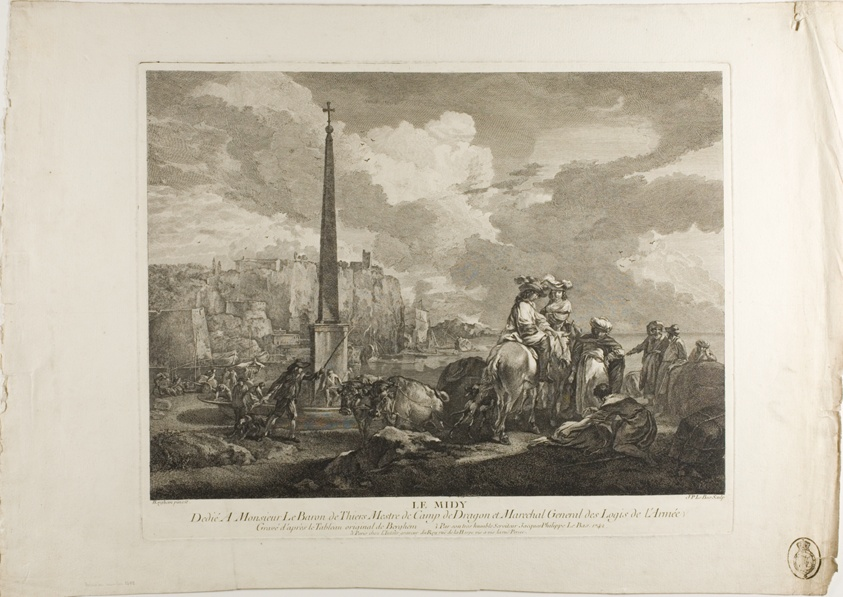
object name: Print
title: Le Midy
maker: Jacques Philippe Le Bas (French, 1707-1783); after Nicolaes Berchem, the elder (Dutch, 1620-1683)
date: 1742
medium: Engraving on paper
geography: France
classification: engraving; print; prints and drawing